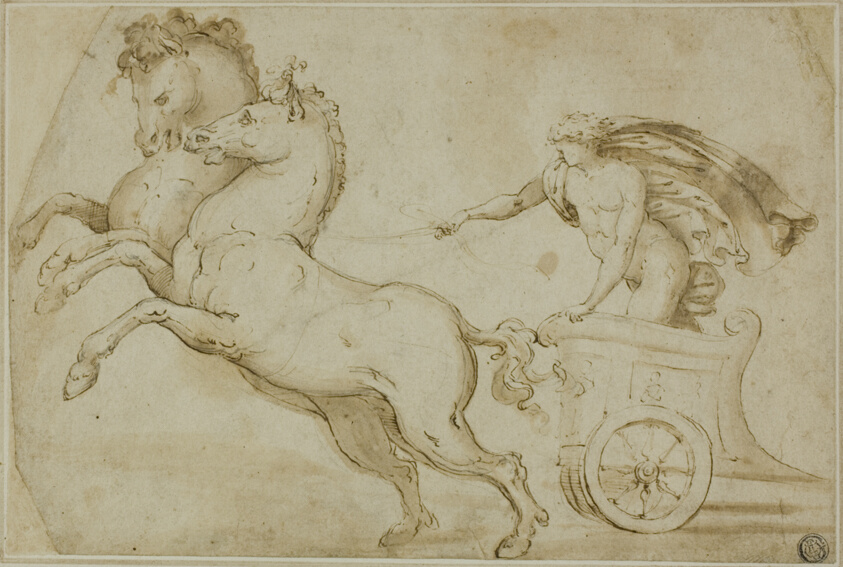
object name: Drawing and Watercolor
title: Apollo Driving the Chariot of the Sun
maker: Workshop of Pietro Buonaccorsi, called Perino del Vaga; Italian, 1501-1547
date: 1519/21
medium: Pen and brown ink with brush and brown wash, and graphite, on ivory laid paper, laid down on ivory laid card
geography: Italy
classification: ink with wash; drawings (visual works); prints and drawing